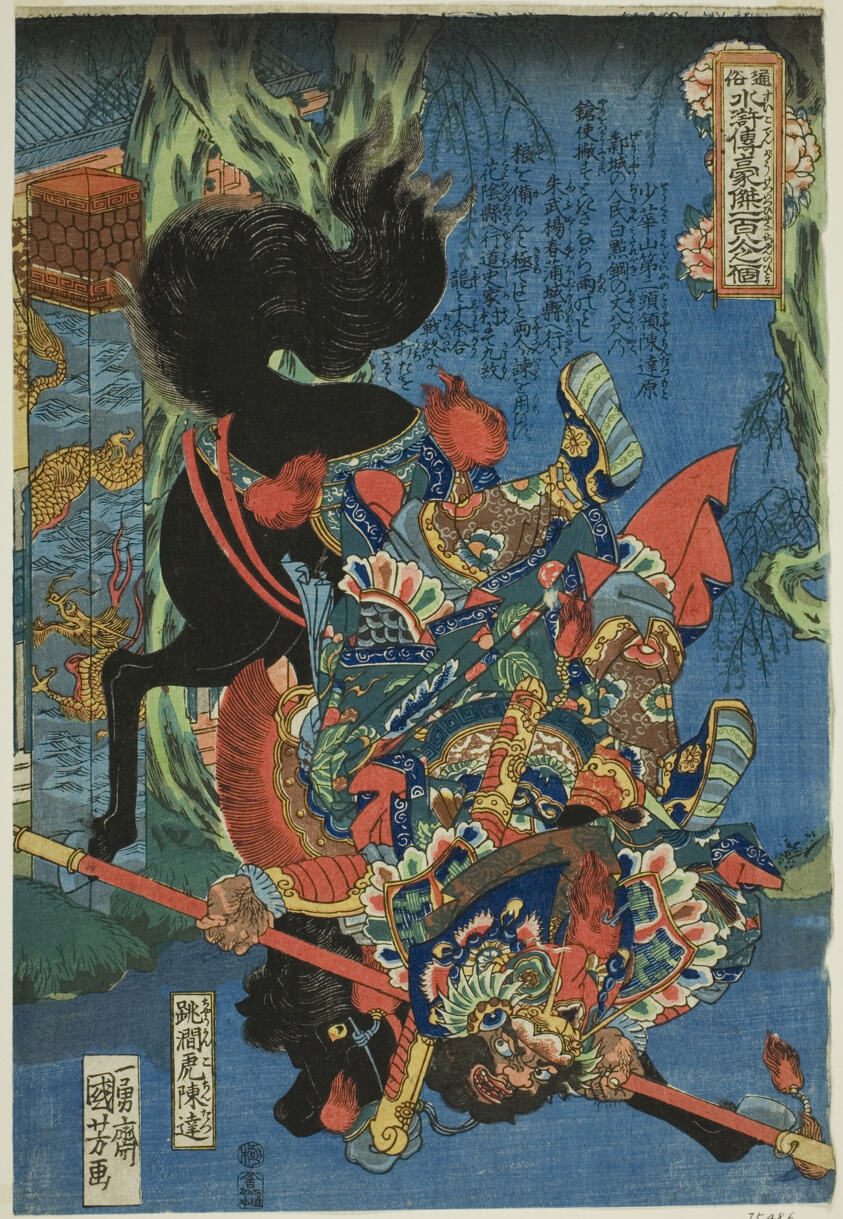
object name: Print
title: Chen Da (Chokanko Chintatsu), from the series "One Hundred and Eight Heroes of the Popular Water Margin (Tsuzoku Suikoden goketsu hyakuhachinin no hitori)"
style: Japanese (culture or style)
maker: Utagawa Kuniyoshi (Japanese, 1797-1861)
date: c. 1827/30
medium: Color woodblock print; left sheet of oban triptych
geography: Japan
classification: woodblock print; print; asian art